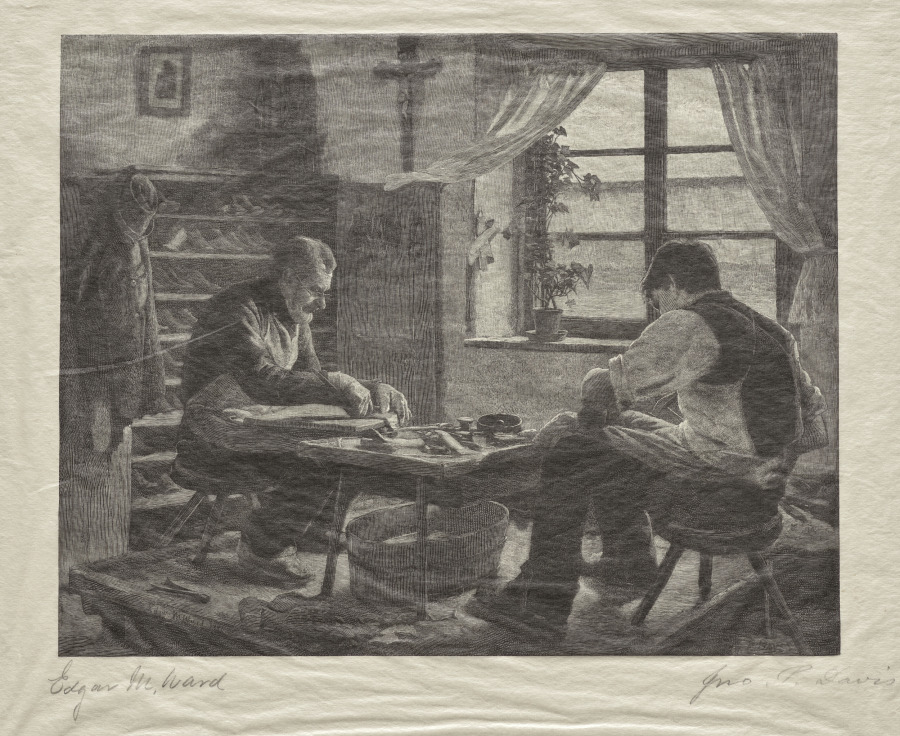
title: The Cobblers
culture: America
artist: John Parker Davis (American, 1832–1910)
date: 1887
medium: wood engraving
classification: Print